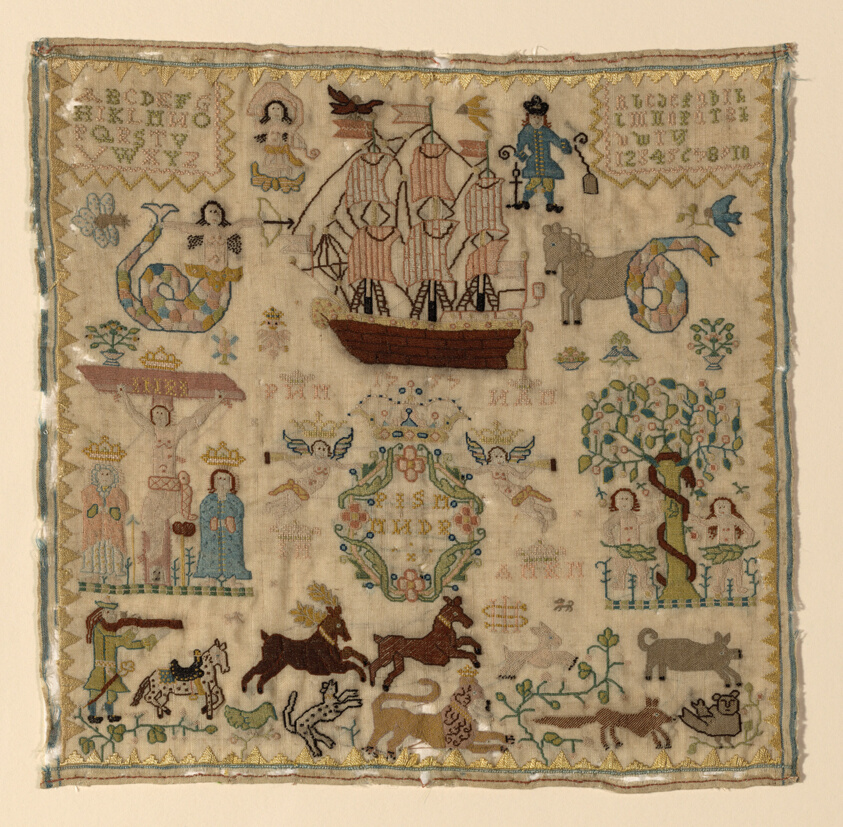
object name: Textile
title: Sampler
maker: Denmark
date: 1757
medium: Linen, plain weave; embroidered in silk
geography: Denmark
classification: textile; needlework (visual works)